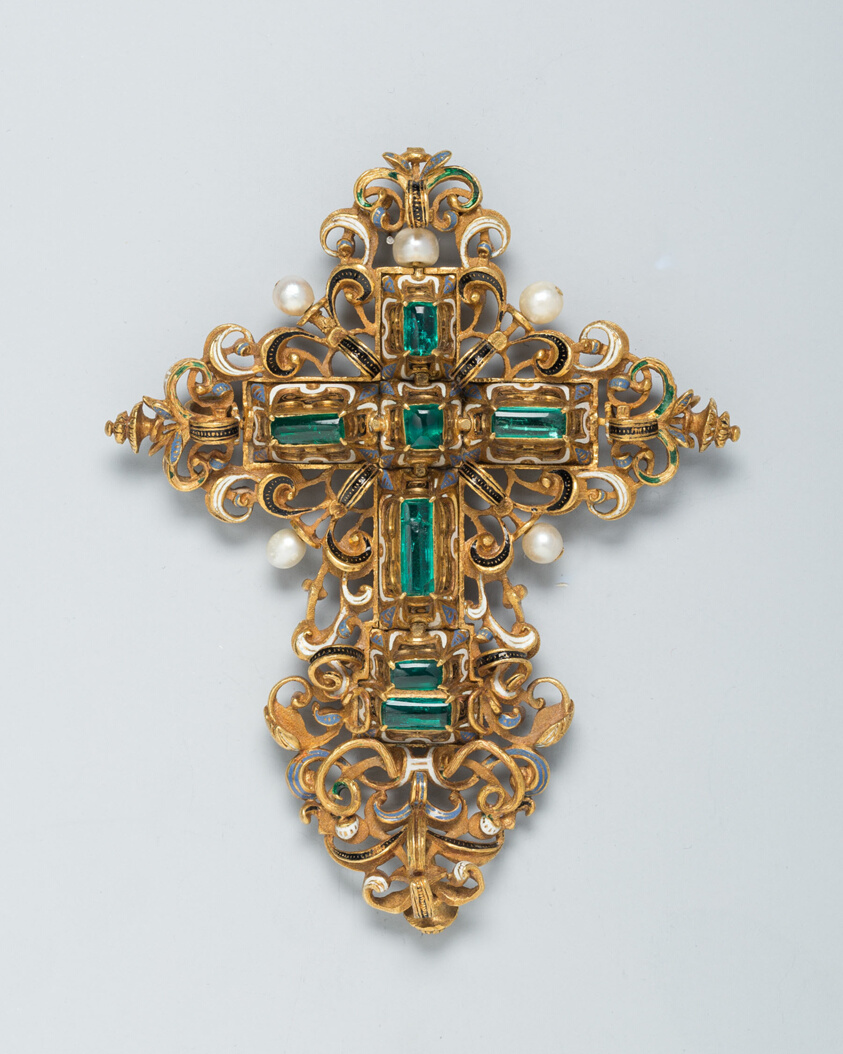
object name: Costume and Accessories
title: Pendant Cross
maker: Spanish or South German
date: c. 1575-c. 1625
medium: Gold, enamel, emeralds, and pearls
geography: Spain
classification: pendant (jewelry); jewelry; european decorative arts; costume